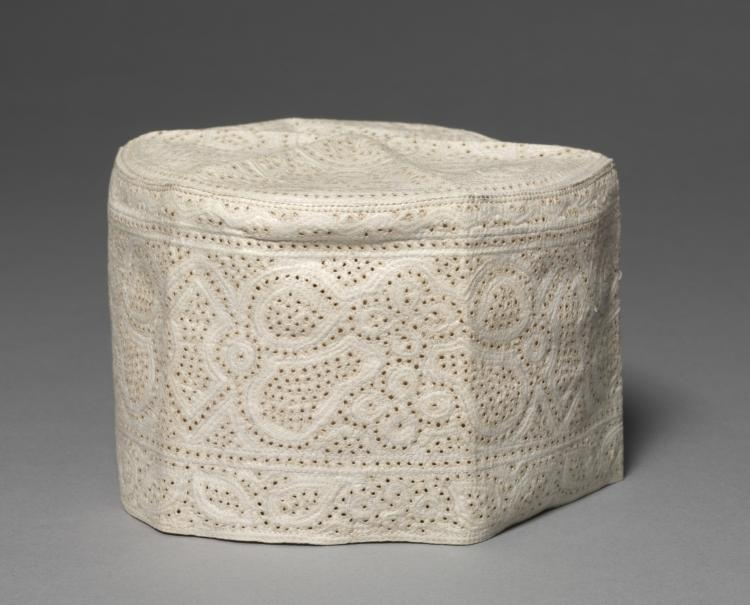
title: Cap (kofia ya kiua or barghashia)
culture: Africa, East Africa, Tanzania, Zanzibar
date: c. 1900s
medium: cotton on cotton; tabby weave, machine quilting, and eyelet embroidery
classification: Garment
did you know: The small holes in this cap allow air to circulate, keeping the wearer's head cool.